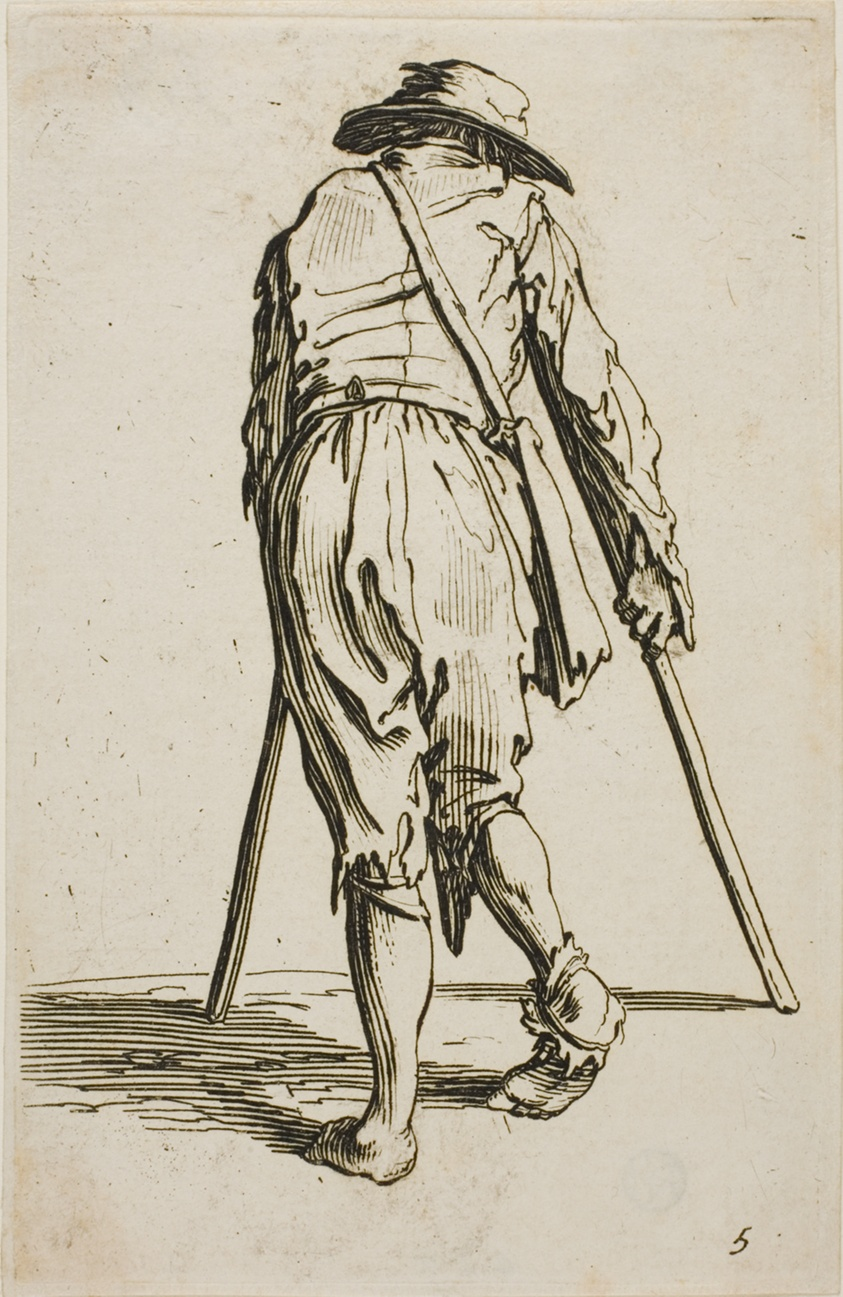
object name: Print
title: Beggar on Crutches and Wearing a Hat, seen from Back, plate five from The Beggars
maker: Jacques Callot (French, 1592-1635)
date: c. 1622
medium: Etching on ivory laid paper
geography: France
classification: etching; print; prints and drawing